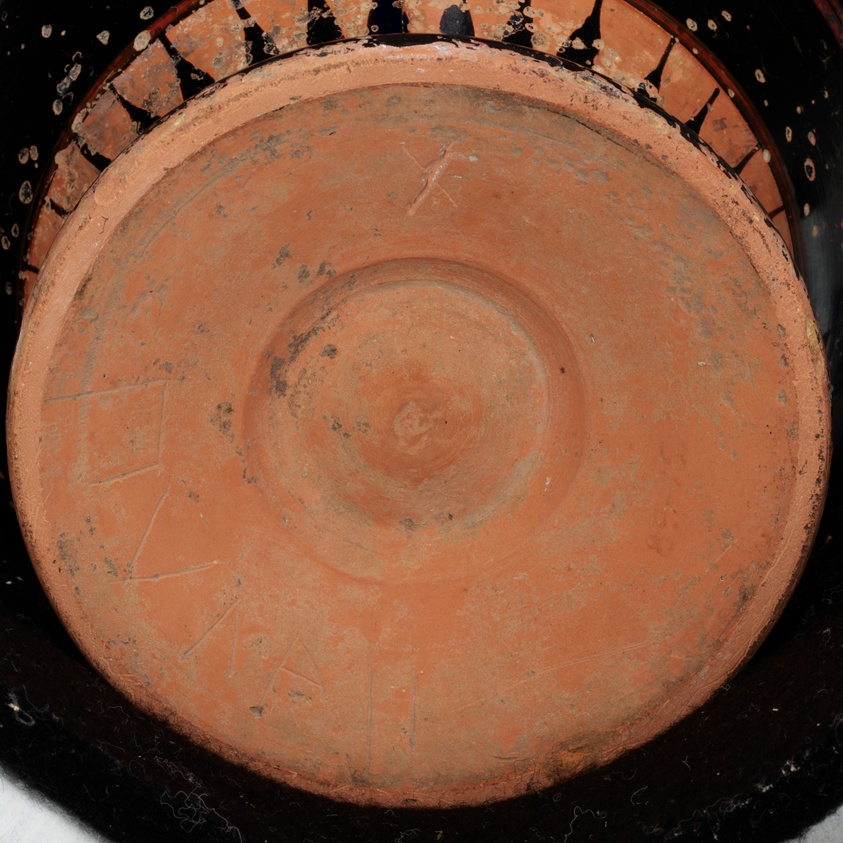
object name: Vessel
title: Hydria (Water Jar)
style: archaic (greek), attic, black-figure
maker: Attributed to a painter of the Leagros group; Greek; Athens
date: about 515-500 BCE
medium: terracotta, black-figure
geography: Athens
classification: vessel; earthenware; ceramics; ancient art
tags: mythological figures, drinking, Heracles, Aphrodite